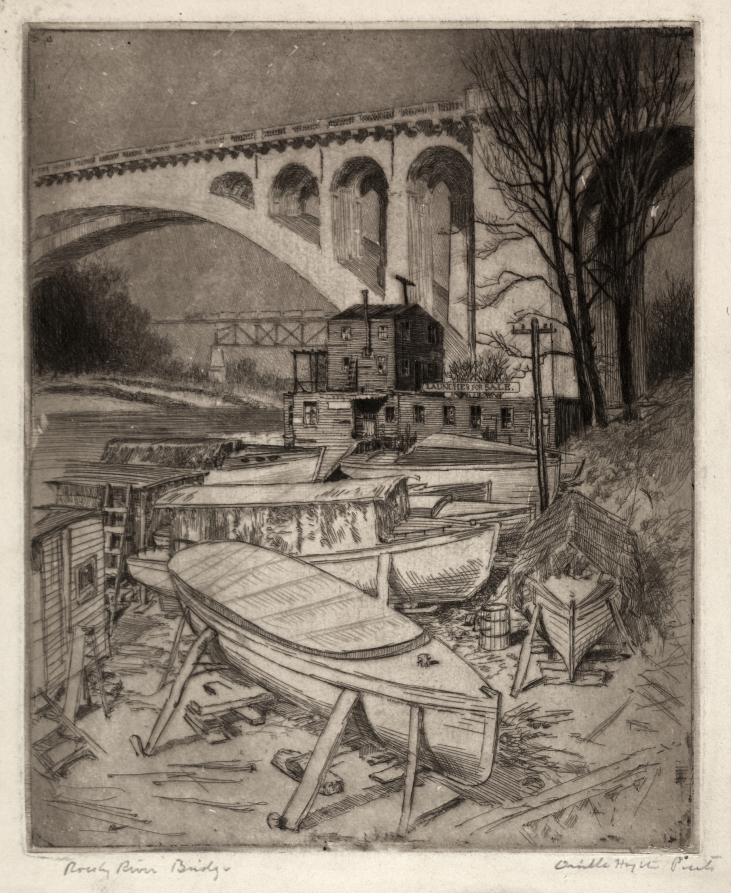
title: Rocky River Bridge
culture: America, Ohio, Cleveland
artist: Orville Houghton Peets (American, 1884–1968)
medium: etching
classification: Print